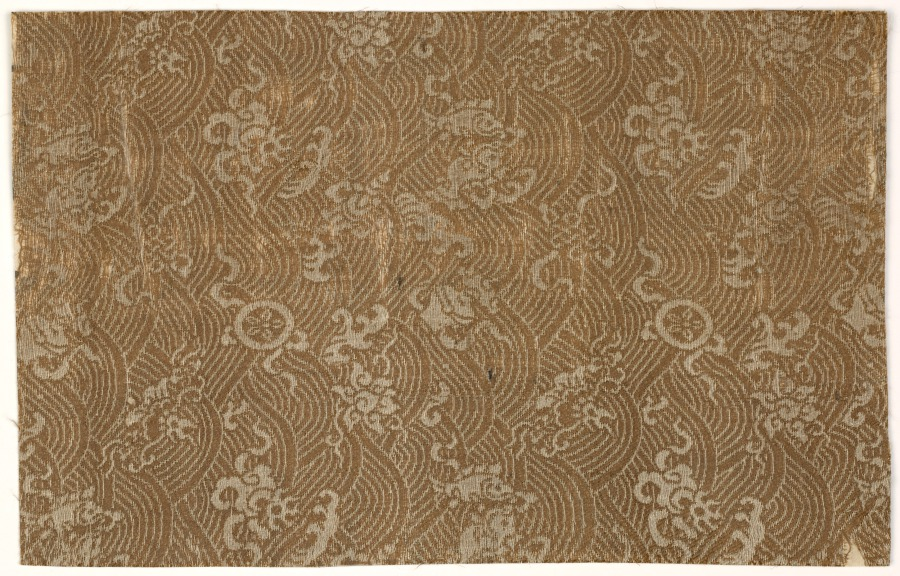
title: Textile Fragment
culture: Japan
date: 1800s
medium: silk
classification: Textile